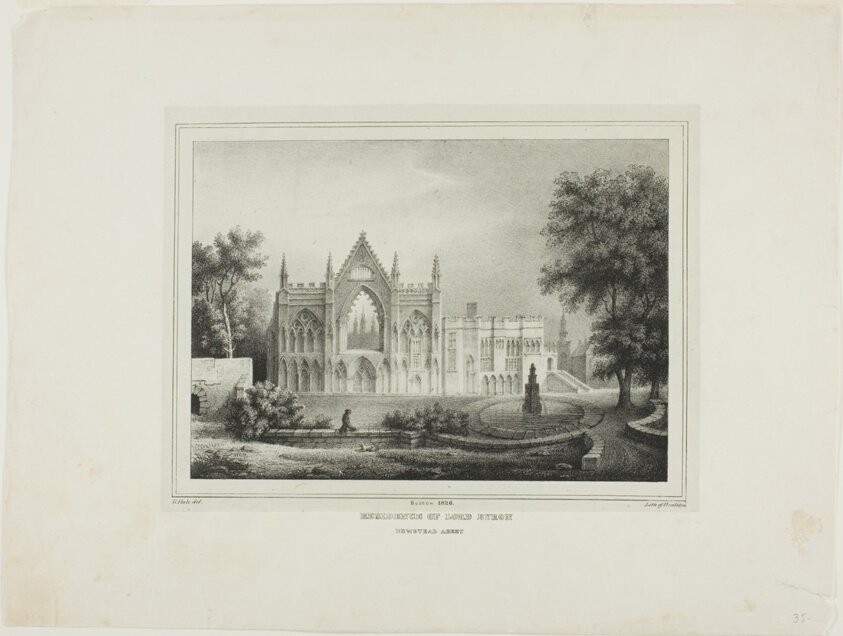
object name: Print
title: Residence of Lord Byron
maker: Rembrandt Peale (American, 1778-1860)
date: 1826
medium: Lithograph on ivory wove chine laid down on off-white wove paper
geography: United States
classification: lithograph; print; prints and drawing